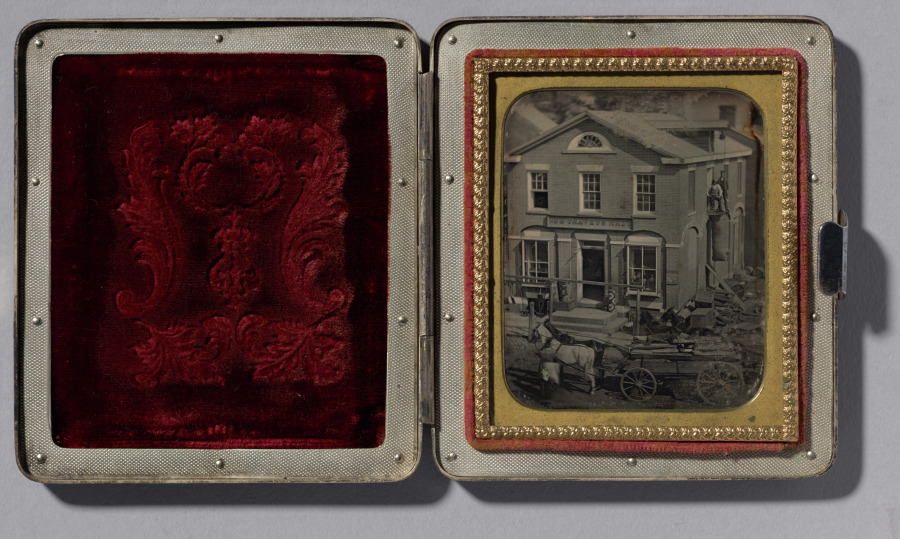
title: Construction of the John Stewart Store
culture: America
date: c. 1856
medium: daguerreotype, sixth plate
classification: Photograph